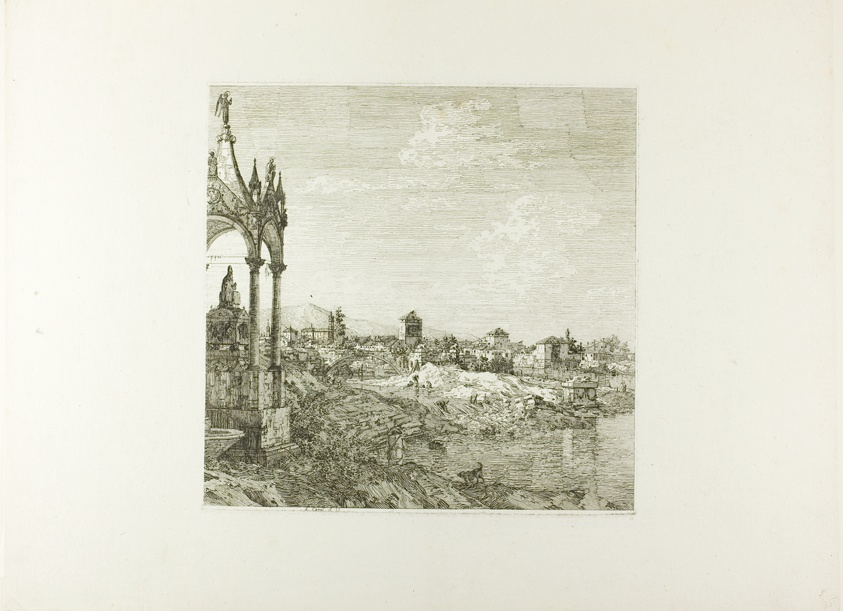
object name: Print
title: View of a Town with a Bishop's Tomb, from Vedute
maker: Canaletto (Italian, 1697-1768)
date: 1735/44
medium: Etching in black on ivory laid paper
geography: Italy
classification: etching; print; prints and drawing